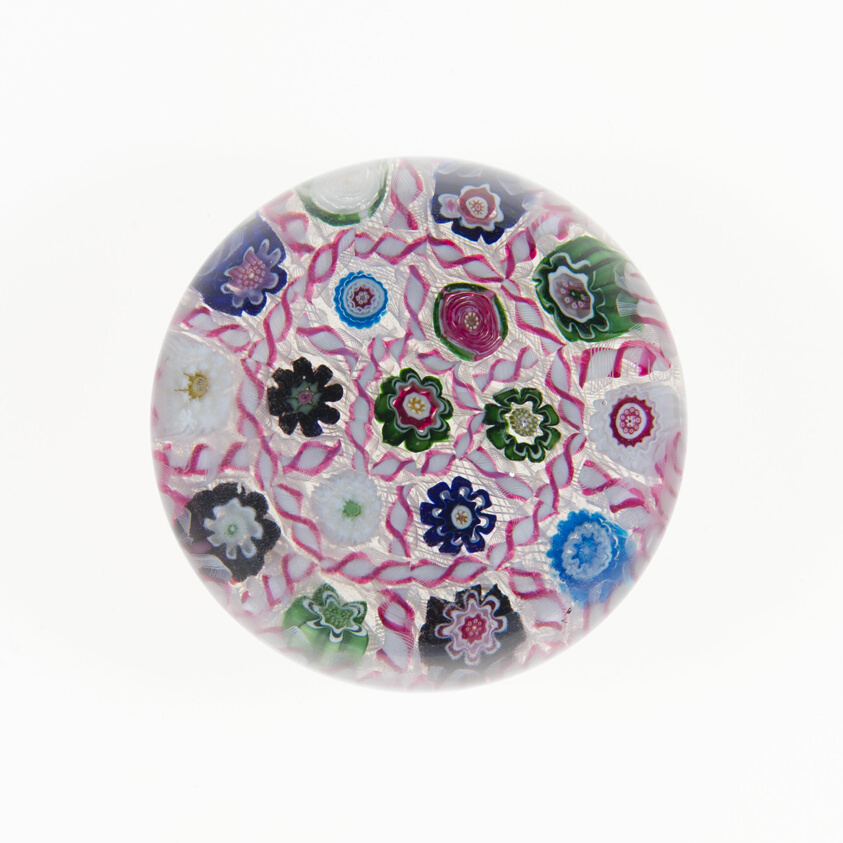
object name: Glass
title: Paperweight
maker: Clichy Glassworks (Cristalleries de Clichy); Clichy, France, 1837-1885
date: 19th century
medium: Glass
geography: Clichy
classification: paperweight; millefiori; european decorative arts; glass